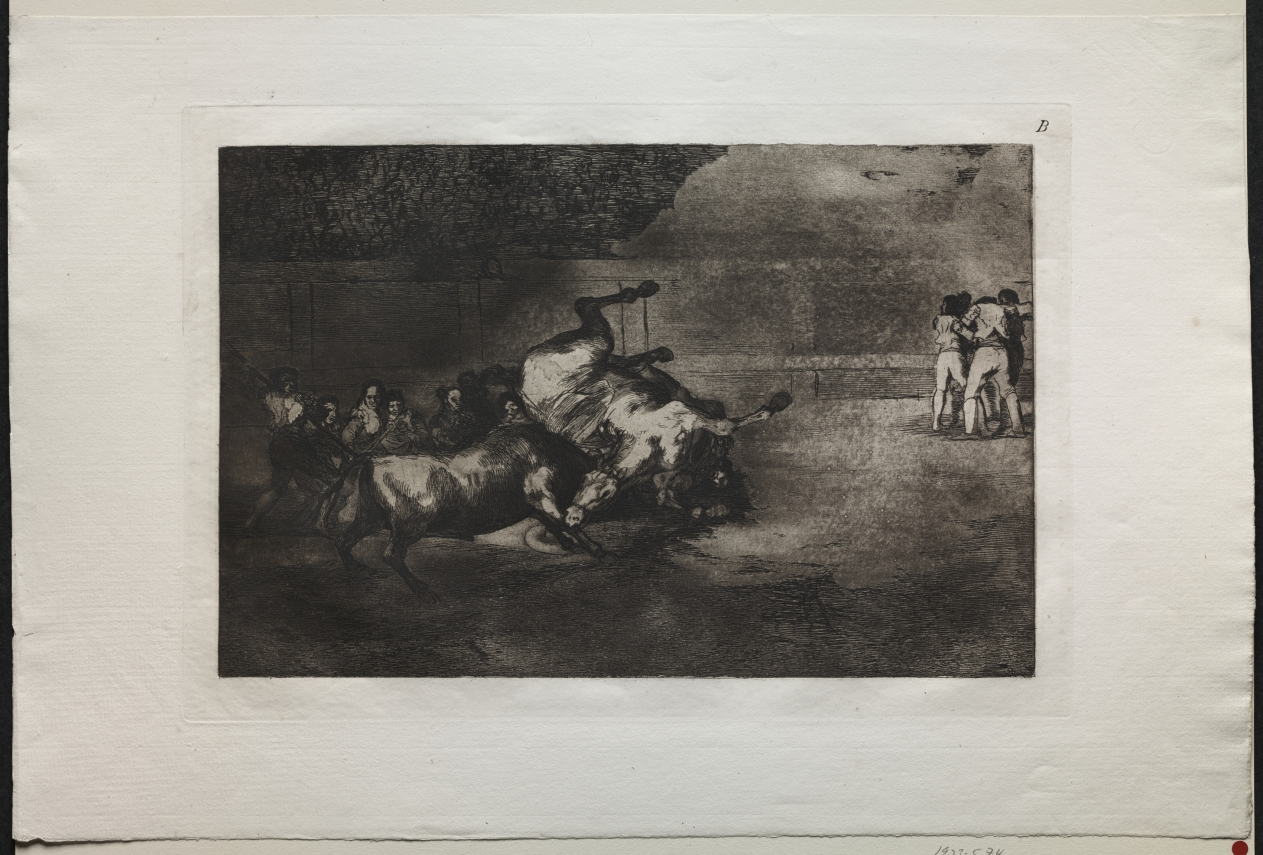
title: Bullfights: A Horse Thrown by the Bull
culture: Spain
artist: Francisco de Goya (Spanish, 1746–1828)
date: 1816, printed 1876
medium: engraving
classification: Print